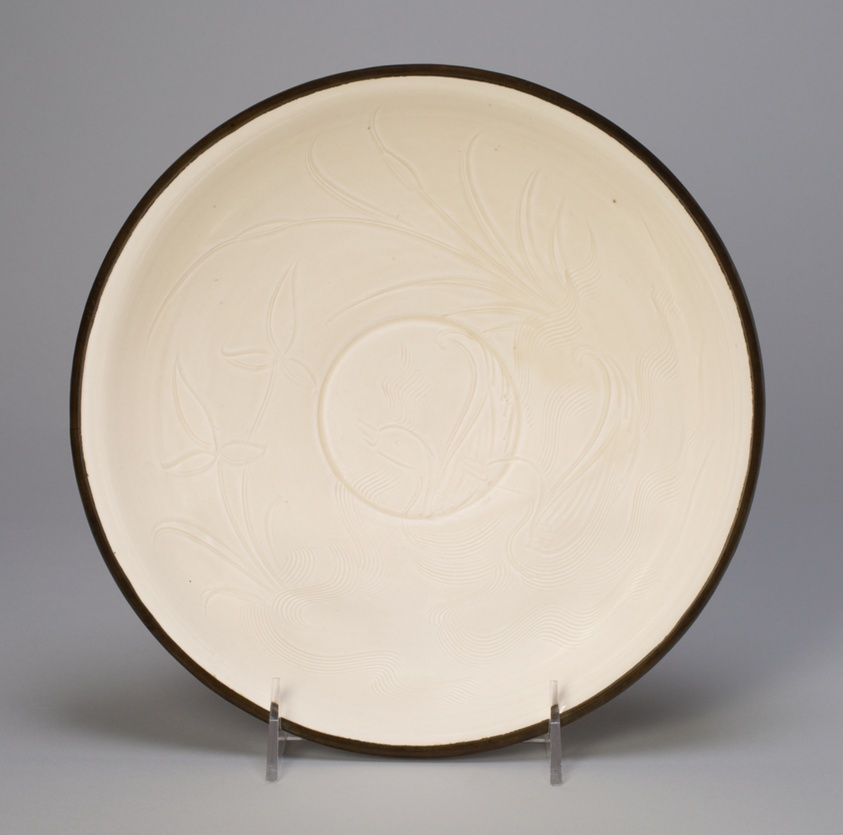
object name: Vessel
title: Bowl with Mandarin Ducks among Leaves and Cattails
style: Chinese (culture or style)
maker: China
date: Northern Song dynasty, (960–1127), 11th century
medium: Ding ware; porcelain with underglaze carved and incised decoration; metal rim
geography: China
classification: bowl; porcelain; dish (vessel); asian art; ceramics; vessel